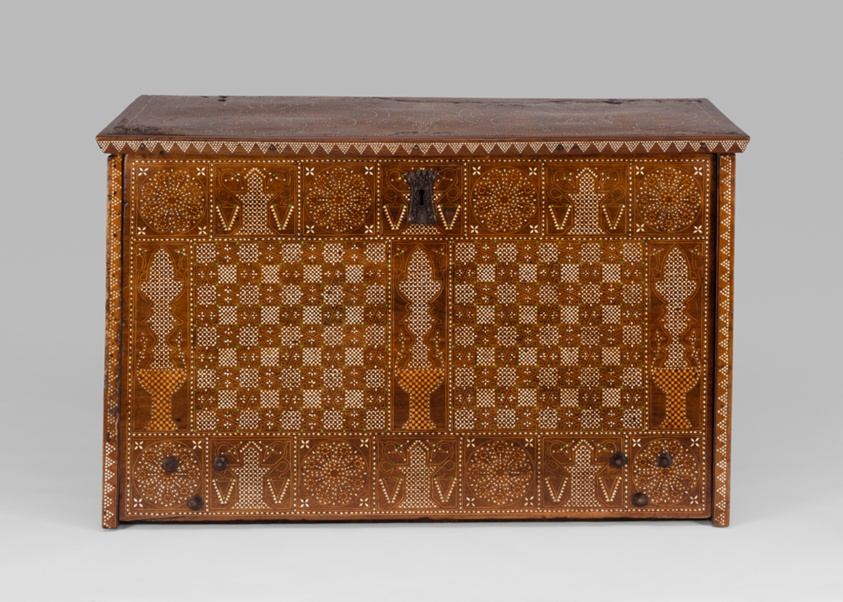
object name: Furniture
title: Writing Cabinet (Escritorio)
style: Islamic, hispano-moresque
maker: Spanish, possibly Granada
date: 1500/50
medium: Walnut, boxwood, bone, iron, copper alloy, and gilding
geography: Granada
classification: furniture; islamic; decorative arts; furnishings; furnishings (transportable); inlay; writing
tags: geometric